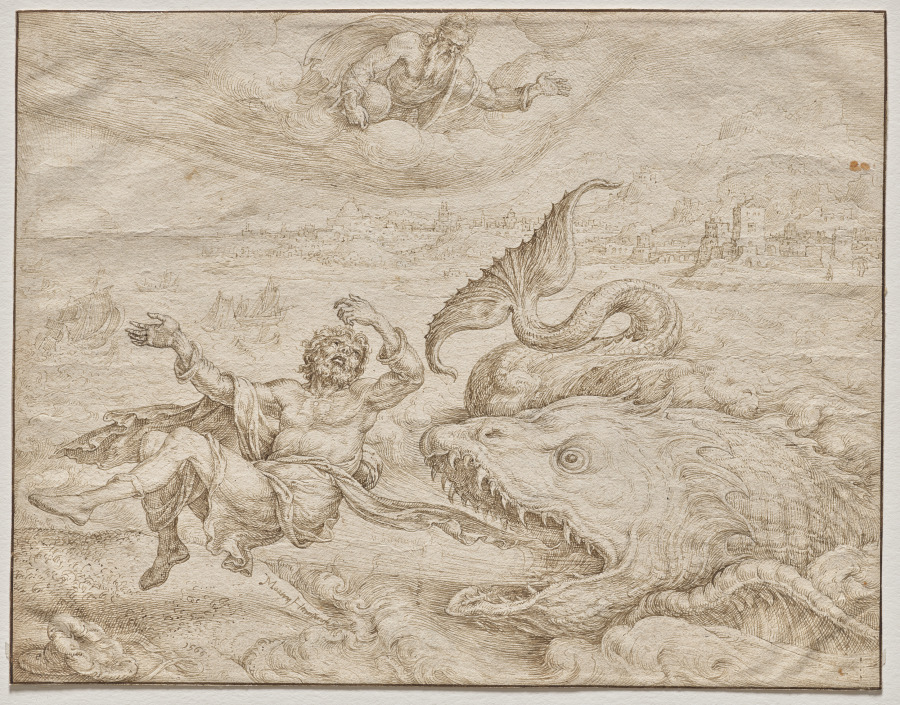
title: Jonah Cast Out by the Whale onto the Shore of Nineveh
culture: Netherlands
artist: Maarten van Heemskerck (Dutch, 1498–1574)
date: 1566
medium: Pen and brown ink over indications in black chalk, within brown ink framing lines; indented for transfer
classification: Drawing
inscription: signed and dated in brown ink: Martyn Heemskerck / 1566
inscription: inscribed in black chalk, verso: van heemskerck / histori van jonas no 27, and dese 4 a 5 ...stuk is.. (?)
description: In this dramatic composition, the Old Testament prophet Jonah floats midair after being vomited onto dry land by a giant fish. The artist Maarten van Heemskerck drew the composition as the second of four illustrations of episodes from the biblical book of Jonah, which describes how the prophet was swallowed by a fish and regurgitated after three days. Jonah’s trial was often interpreted as a metaphor for exile and redemption, or for Christ’s resurrection. Heemskerck was one of the most prolific designers of prints in the Netherlands in the mid-1500s. Working with the engraver Philips Galle in his native city of Haarlem, the drawing was indented with a dull knife for transfer onto a copperplate to be engraved. Heemskerck was an instrumental figure in bringing ideas about Italian art to northern Europe. Here, he incorporates architecture and figures reminiscent of types he saw and sketched on a trip to Italy in the 1530s.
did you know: The artist’s rendering of a fish is neither a shark nor a whale, but rather a fictional combination of the two, a product of the artist’s knowledge of ornamental designs and his own imagination.